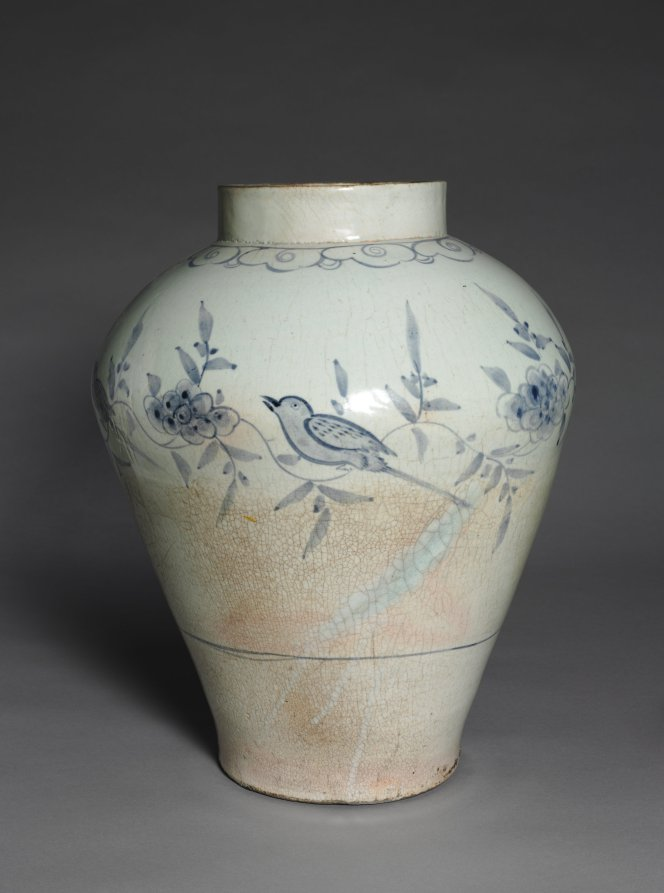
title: Jar with Bird and Flower Decoration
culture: Korea, Joseon dynasty (1392–1910)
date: 1700s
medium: stoneware with underglaze blue designs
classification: Ceramic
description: Joseon blue-and-white porcelains were called “靑畫," meaning “painted in blue.” The blue here indicates cobalt pigment. In the 1700s, the royal court banned the importation of cobalt blue for its luxurious nature; thus, relatively few Joseon blue-and-white porcelain vessels were produced at that time. In that context, this modest-looking jar was considered to be a rare luxury.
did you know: Cobalt blue, an expensive imported mineral from Persia (modern-day Iran), was officially banned for use in Korea during the 1700s.